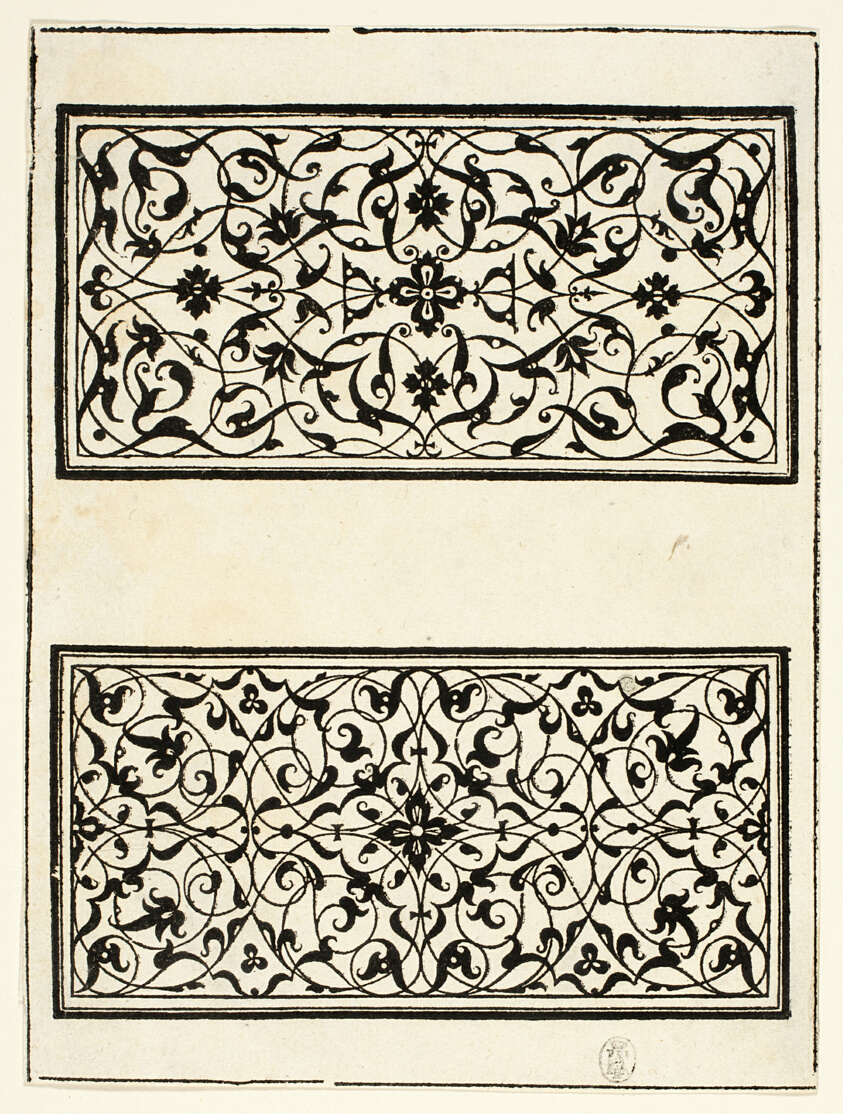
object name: Print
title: Ornamental Panels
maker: Hans Rudolf Manuel Deutsch (Swiss, 1525-1572); printed by Andrea Gessner (Swiss/German, born 1560)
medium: Woodcut in black on paper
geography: Switzerland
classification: woodcut; print; prints and drawing